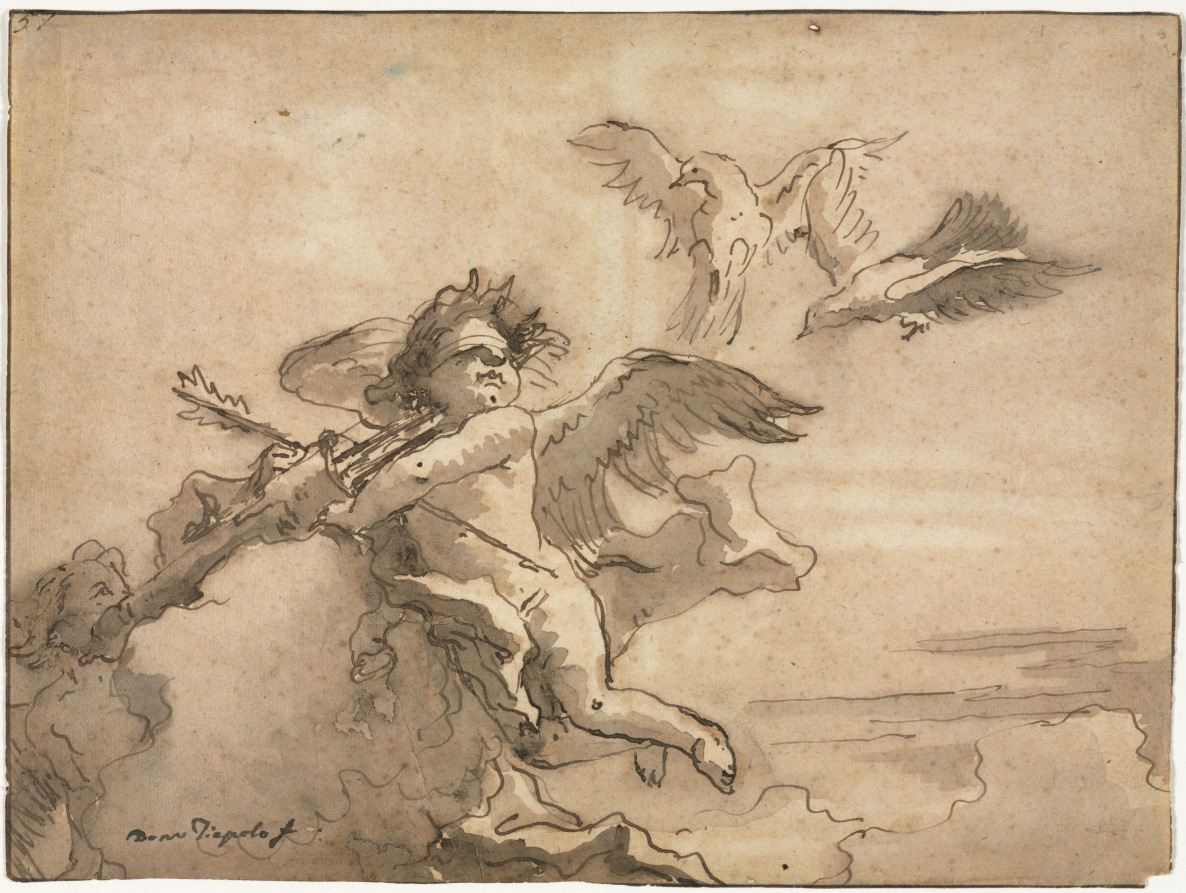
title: Cupid Blindfolded and Two Doves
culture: Italy, 18th century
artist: Giovanni Domenico Tiepolo (Italian, 1727–1804)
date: 1757 or after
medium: pen and brown ink and brush and brown wash; framing lines in brown ink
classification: Drawing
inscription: signed, lower left, in brown ink: Dom Tiepolo f ; upper left, in brown ink: 57 ; VERSO, center left, in brown ink: 265 [sideways] ; upper left, in blue pencil: 39. #7 ; upper right, in blue pencil: 100ºº ; center, in graphite: 15 [5 is crossed out] ; center right, in graphite: [illegible]